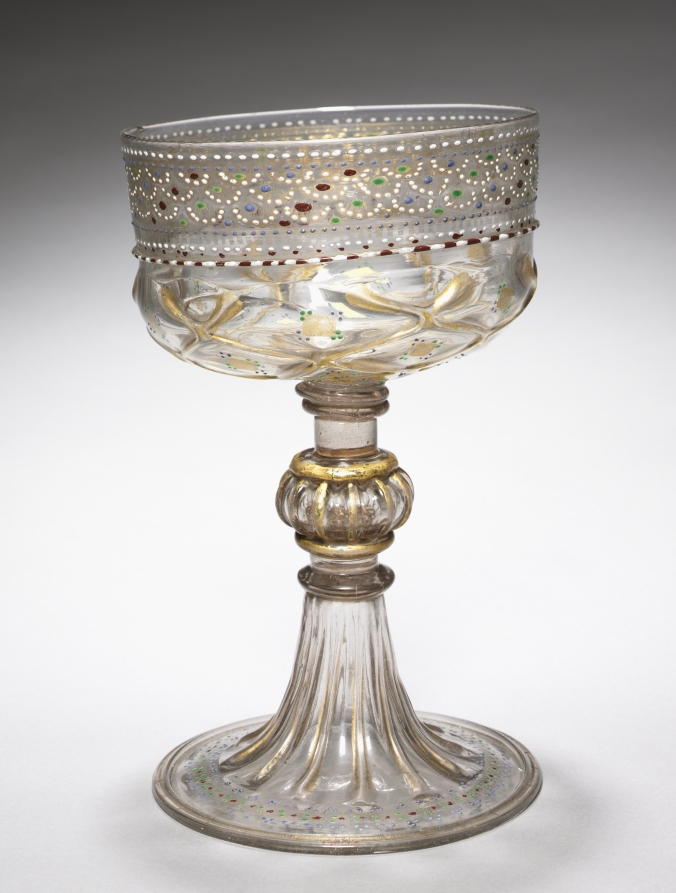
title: Standing Cup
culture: Italy, Venice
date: late 1400s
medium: glass, enameled and gilded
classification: Glass